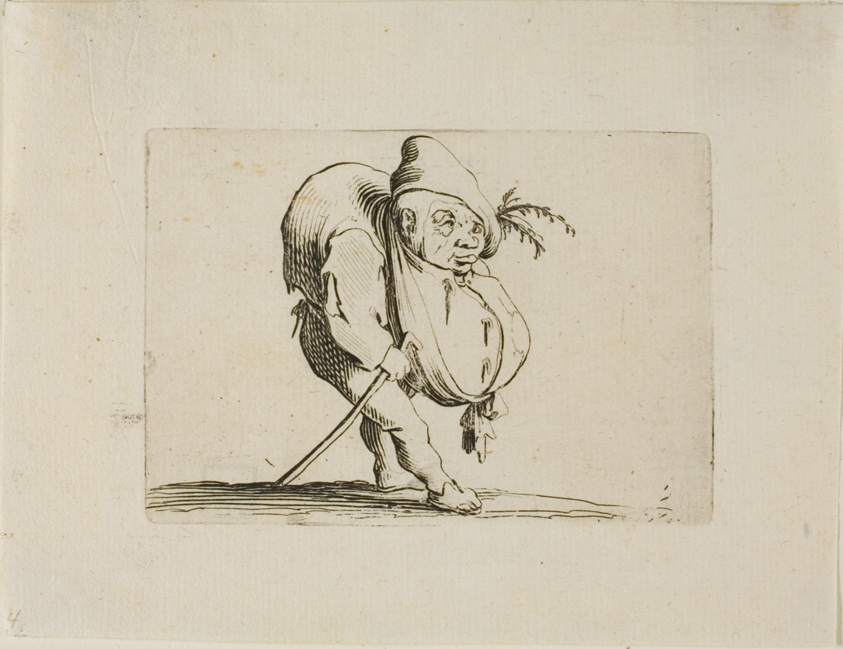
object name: Print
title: The Uneven One with a Cane, from Varie Figure Gobbi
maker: Jacques Callot (French, 1592-1635)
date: 1616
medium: Etching on paper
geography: France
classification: engraving; print; prints and drawing